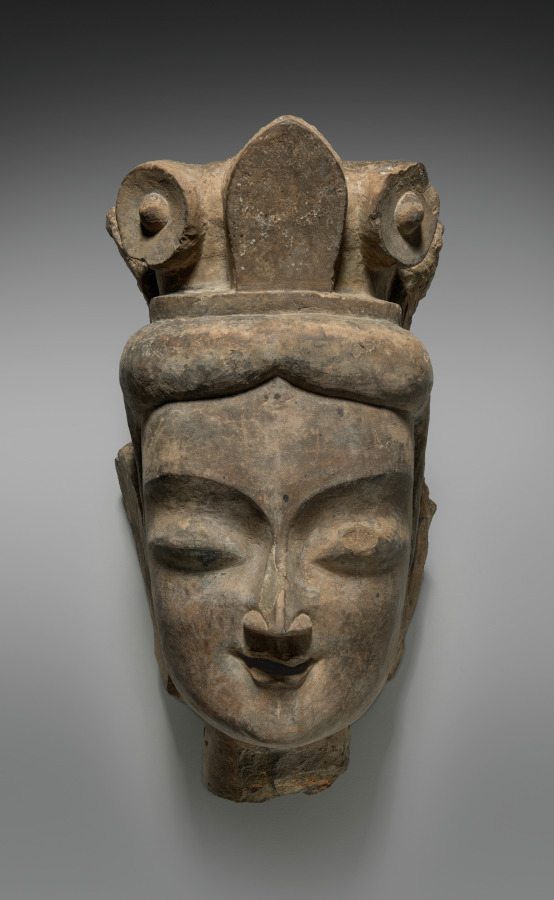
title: Head of Bodhisattva Guanyin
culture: China, Six Dynasties period (317-581), Northern Wei dynasty (386-534)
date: c. 510–520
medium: stone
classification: Sculpture